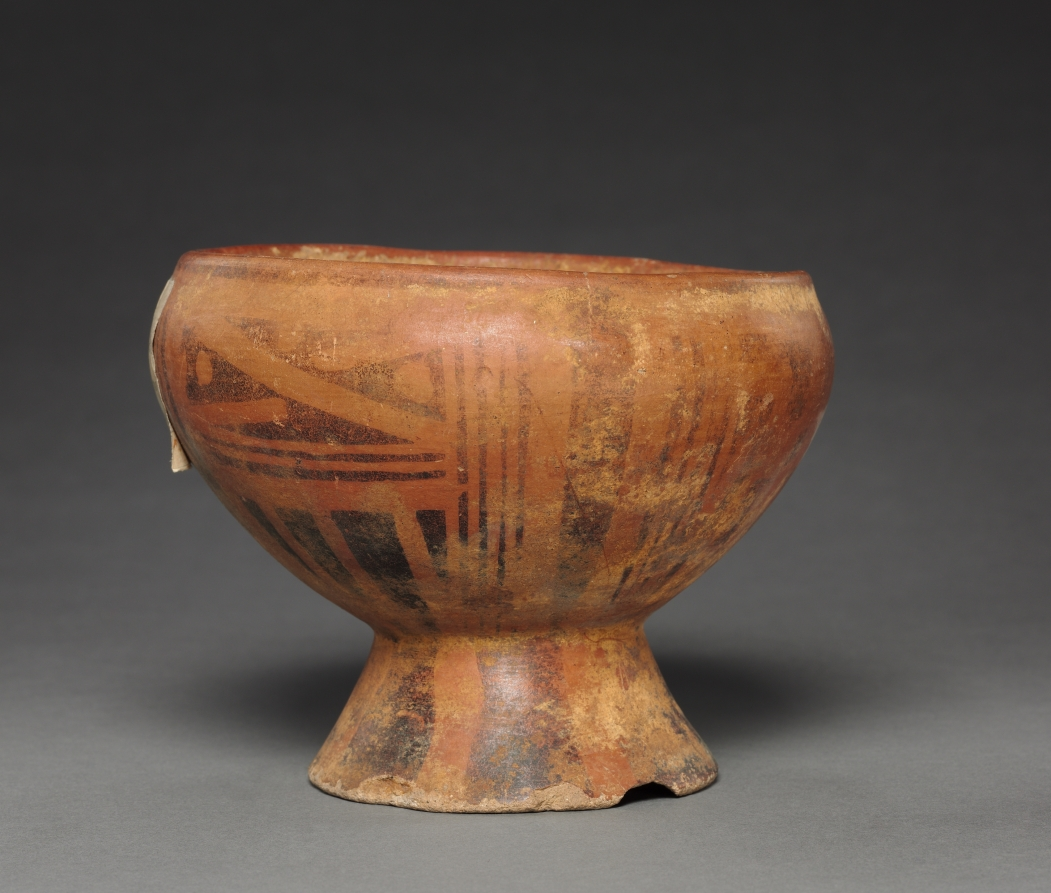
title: Vase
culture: Colombia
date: before 1550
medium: red ware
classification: Ceramic